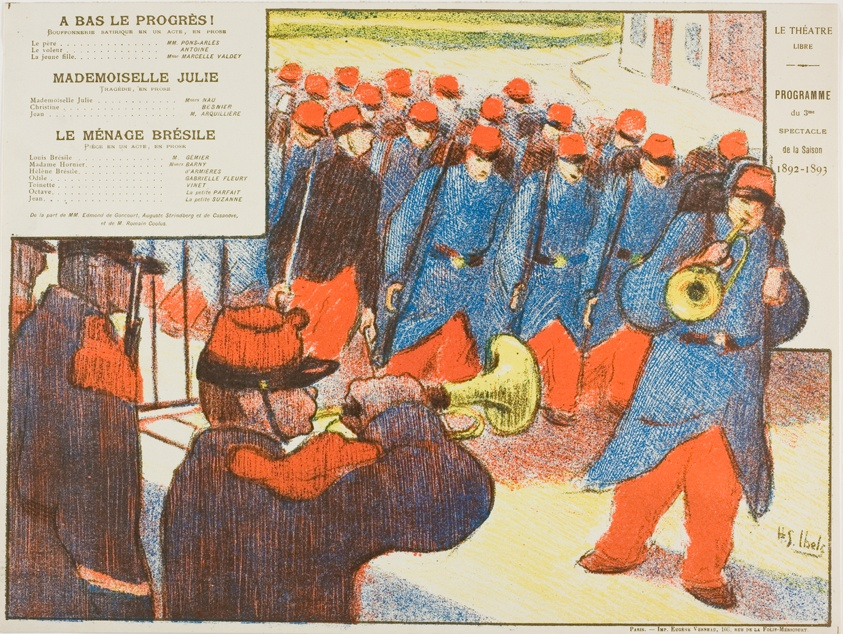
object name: Print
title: Third Performance: A Bas le progrès!, Mademoiselle Julie, Le Ménage Brésile, for Le Théatre Libre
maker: Henri-Gabriel Ibels (French, 1867-1936); printed by Imprimerie Eugène Verneau (French, 19th century-1906)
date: 1892–93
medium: Color lithograph on ivory wove paper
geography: France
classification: lithograph; print; prints and drawing